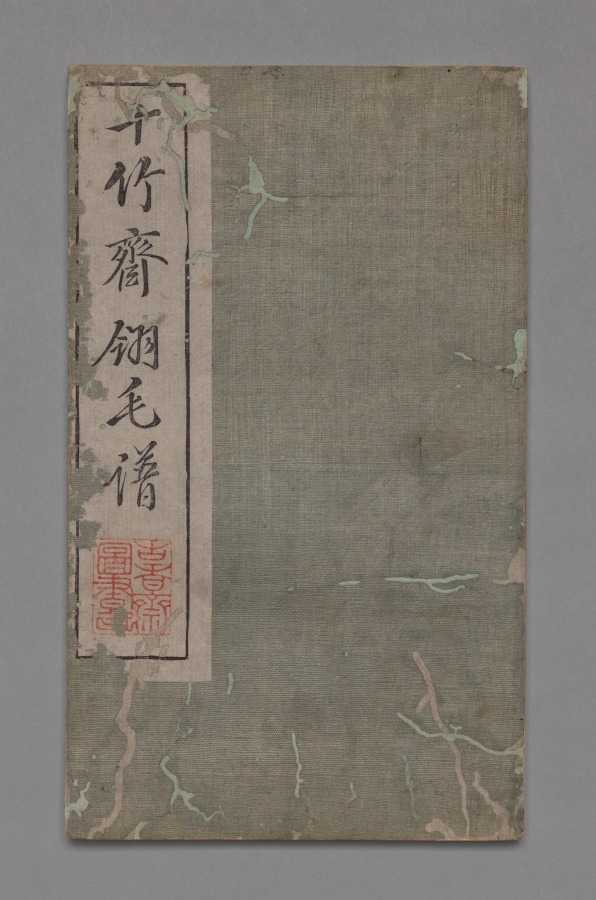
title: Ten Bamboo Studio Painting and Calligraphy Handbook (Shizhuzhai shuhua pu): Birds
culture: China, Qing dynasty (1644-1911)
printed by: Hu Zhengyan (Chinese, c. 1584–1674)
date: 1633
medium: Woodblock-printed book; ink and colors on paper; first edition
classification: Print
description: Color printing reached a level of perfection in the early 1600s, as seen in this Ten Bamboo Studio Collection of Calligraphy and Painting and the Mustard Seed Garden Manual of Painting (printed 1679 and 1701). The painterly quality, precision in registering (aligning) the woodblocks, and harmonious colors made them the most successful color print editions in Chinese history. Both editions were printed and compiled in Nanjing, spread nationwide, and had a great impact on the arts in Japan and Korea.